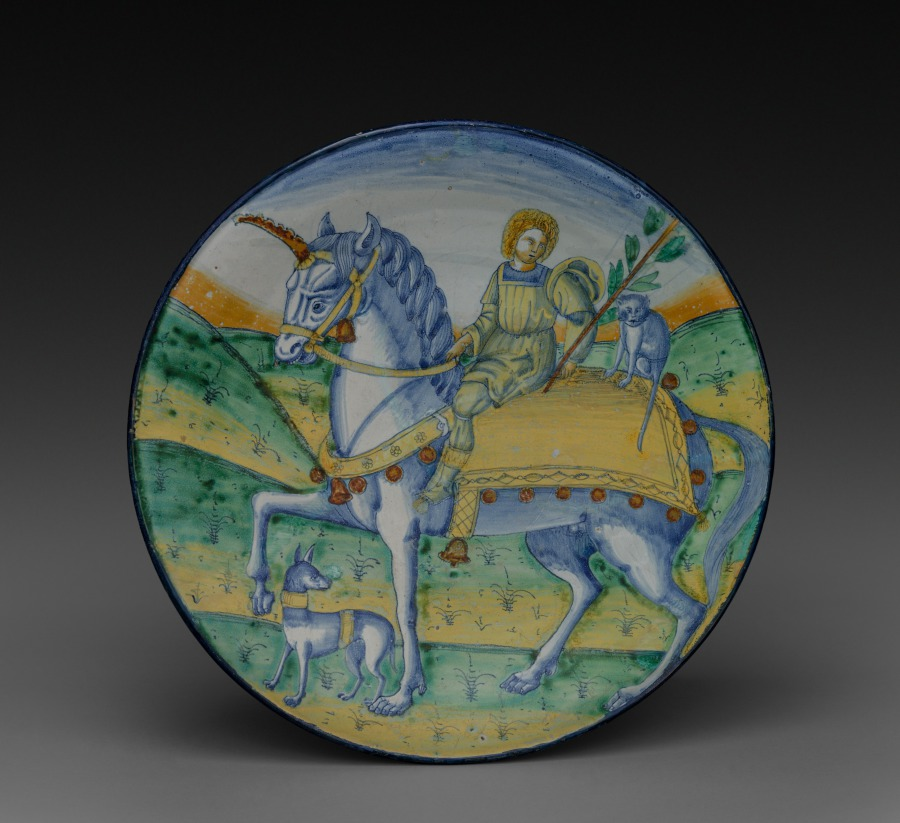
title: Plate: Man Riding a Unicorn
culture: Italy, 16th century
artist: circle of Jacopo Caffagiolo (Italian)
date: c. 1510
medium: tin-glazed earthenware (maiolica)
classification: Ceramic